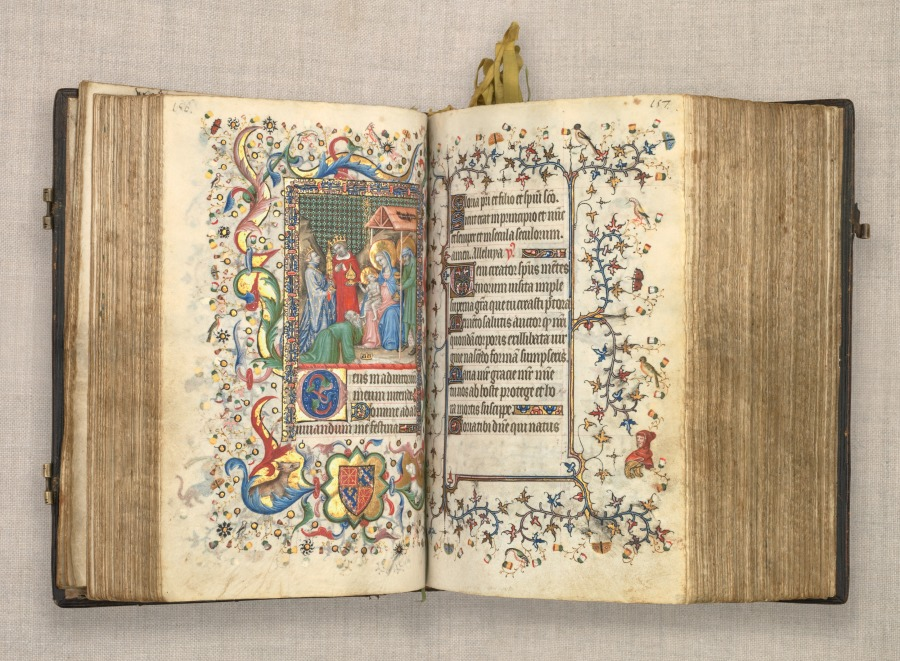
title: Hours of Charles the Noble, King of Navarre (1361-1425): fol. 78v, Adoration of the Magi (Sext)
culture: France, Paris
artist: Master of the Brussels Initials and Associates (French)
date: c. 1405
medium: ink, tempera, and gold on vellum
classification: Bound Volume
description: This precious volume was obviously highly prized by its owner, the French-born King of Navarre, who had his coat of arms painted on no less than twenty folios. Rather than directly commissioning this manuscript from a specific workshop, it seems that Charles the Noble acquired his book of hours -- perhaps ready-made for the luxury market -- while on a trip to Paris in 1404-05. A collaborative effort, six painting styles are evidenced within the pages of this codex, those of two Italians, two Frenchmen, and two Netherlanders. The painter who was responsible for the planning and decoration of the book, and who produced seventeen of the large miniatures, was a Bolognese artist known as the Master of the Brussels Initials. His principal assistant, responsible for most of the borders, was a Florentine who signed his name "Zecho" da Firenze on folio 208 verso.